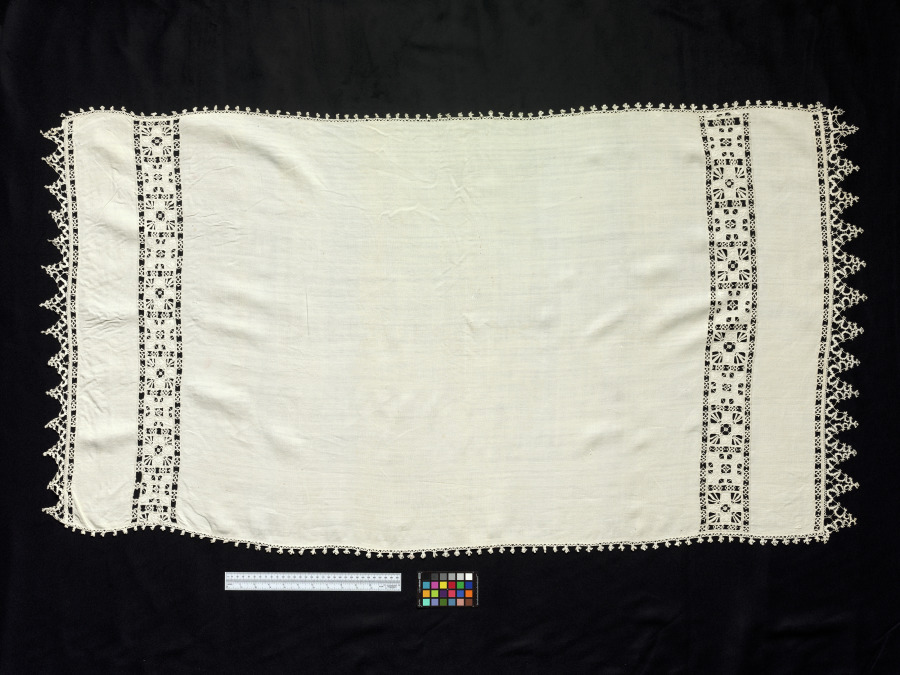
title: Lace Cloth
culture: Italy, Venice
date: 1560–99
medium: Linen: needle lace (cutwork) and bobbin lace edging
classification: Lace